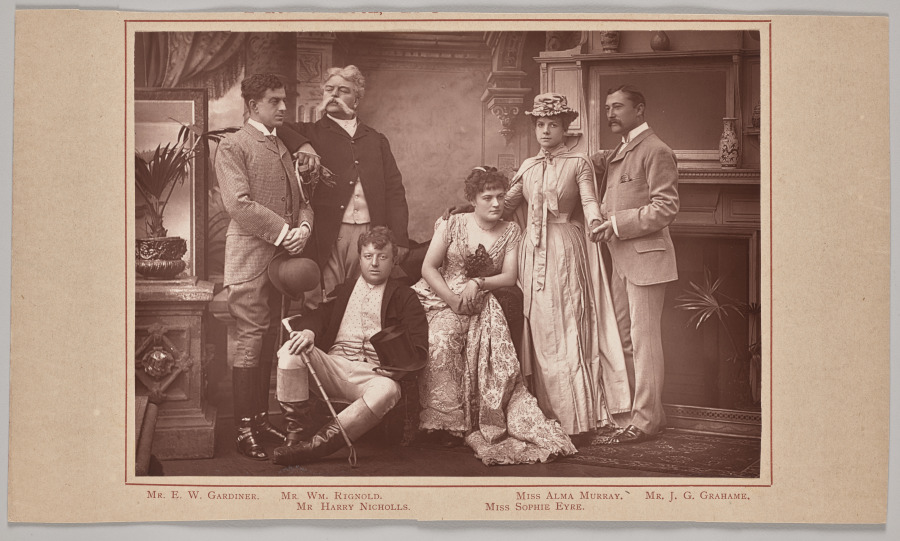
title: "A Run of Luck," at Drury Lane Theatre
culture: England, 19th century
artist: Herbert Rose Barraud (British, 1845–1906)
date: 1886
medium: woodburytype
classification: Photograph